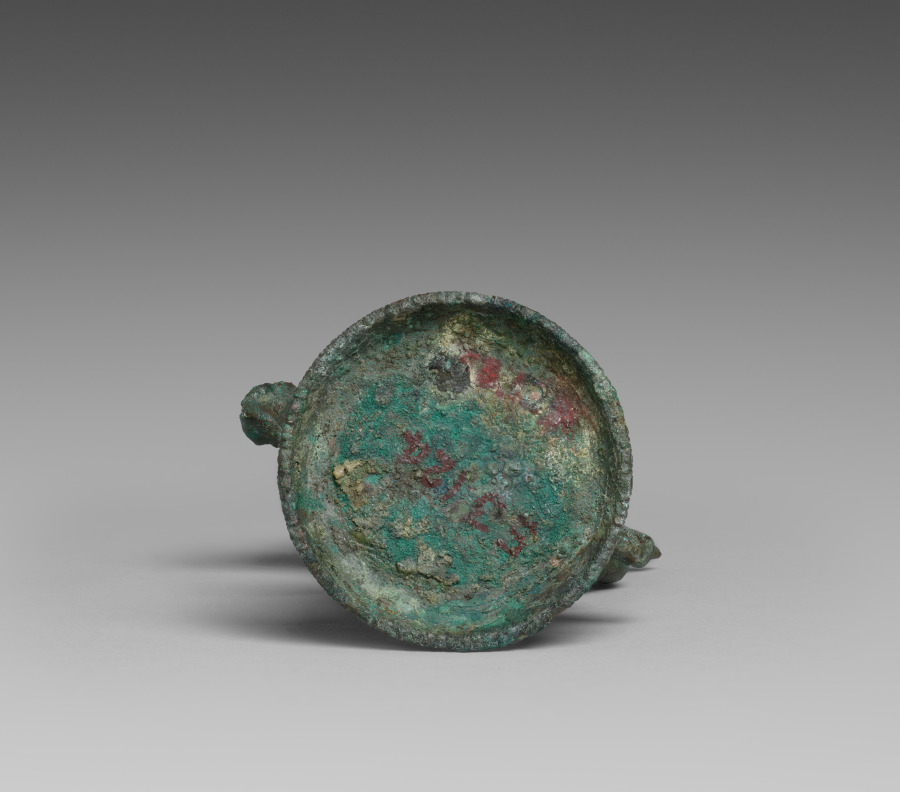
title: Candelabrum Stand of a Dancing Maenad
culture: Etruscan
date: 525–500 BCE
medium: bronze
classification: Sculpture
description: Conceived primarily in two dimensions—front and rear silhouette—this small bronze dancer probably once belonged to an elaborate candelabra or incense burner. The exaggeratedly long fingers and pointed shoes characterize the work as Etruscan, as do the stylized folds of the figure’s dress, which add visual interest but not verisimilitude. While her right hand holds above her head a cylindrical support, her left squeezes a small object, perhaps a fruit or clapper.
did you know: A small turtle beneath the figure’s back foot suggests a rustic setting.